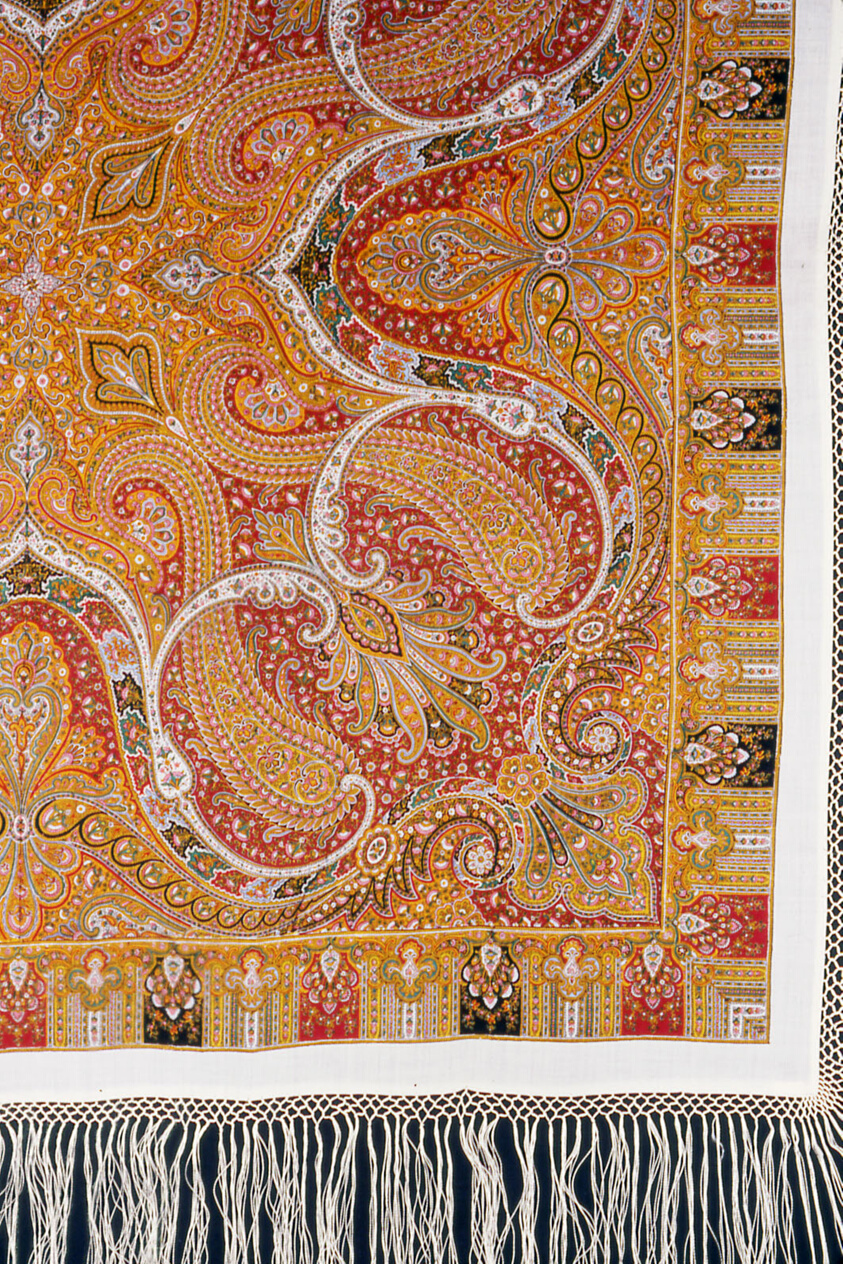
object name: Textile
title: Square Shawl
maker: England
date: 1867/1900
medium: Wool, twill weave; block printed; attached rayon knotted fringe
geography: England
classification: textile; weaving - printed